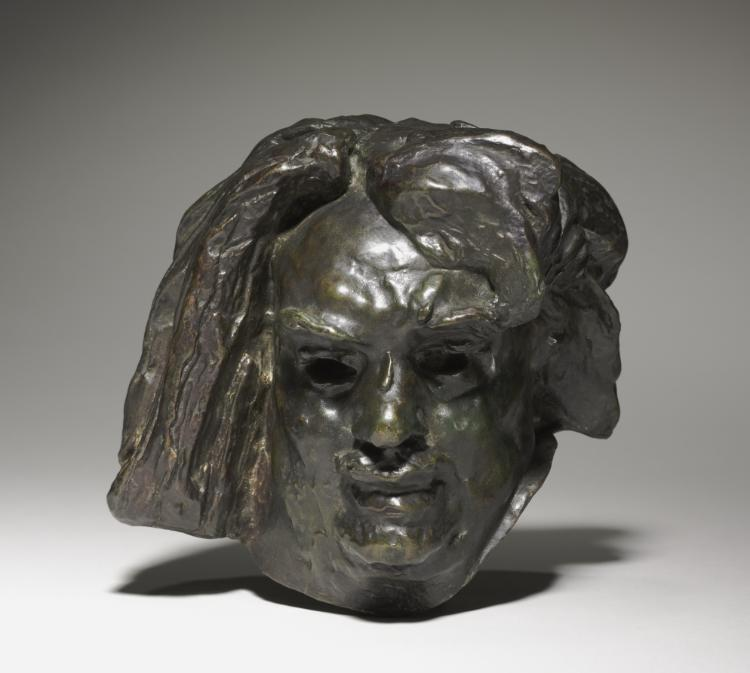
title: Study for the Head of the Monument to Honoré de Balzac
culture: France, late 19th-early 20th Century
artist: Auguste Rodin (French, 1840–1917)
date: 1893–1897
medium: bronze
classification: Sculpture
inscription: Signed on hair to right: "A. Rodin"